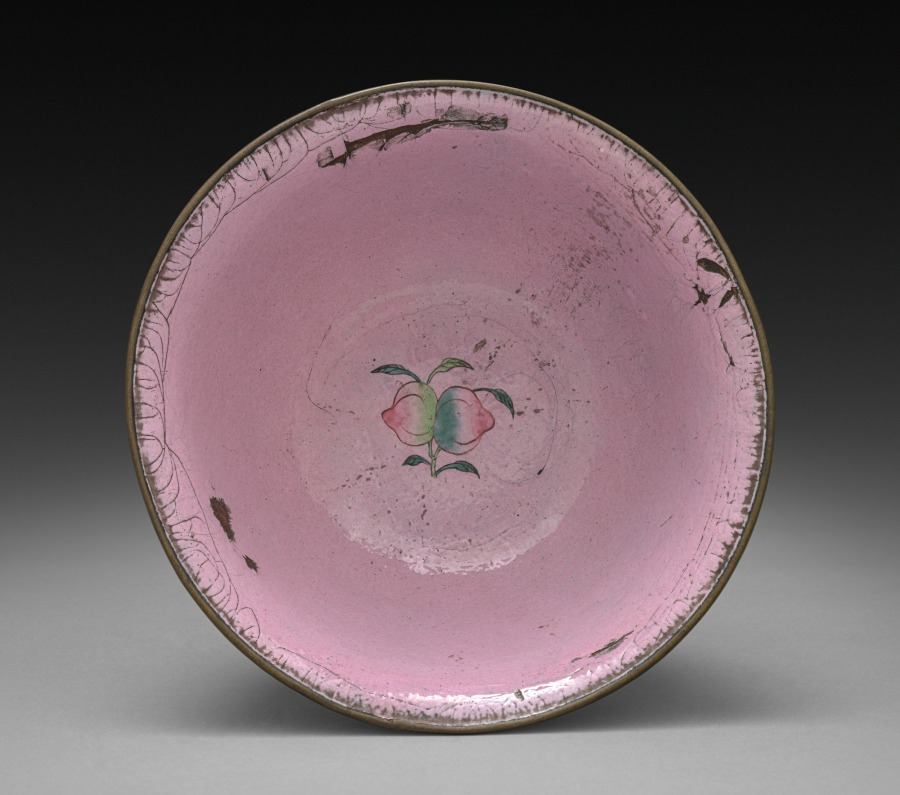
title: Bowl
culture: China, Qing dynasty (1644–1911)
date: 1800s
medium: enamel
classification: Enamel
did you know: The inside of the bowl is decorated with a pair of peaches, a symbol of immortality.